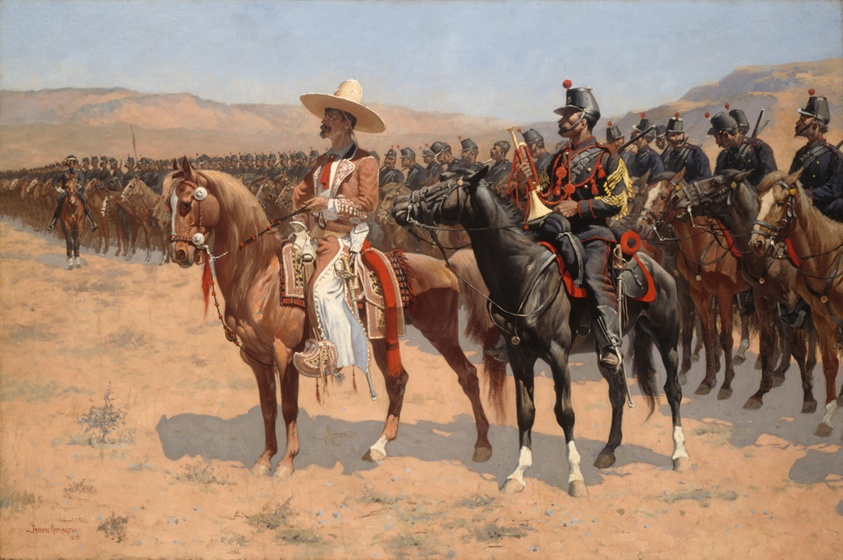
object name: Painting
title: The Mexican Major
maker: Frederic Remington (American, 1861–1909)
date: 1889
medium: Oil on canvas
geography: New York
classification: painting; american arts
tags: fashion, animals, people, portraits